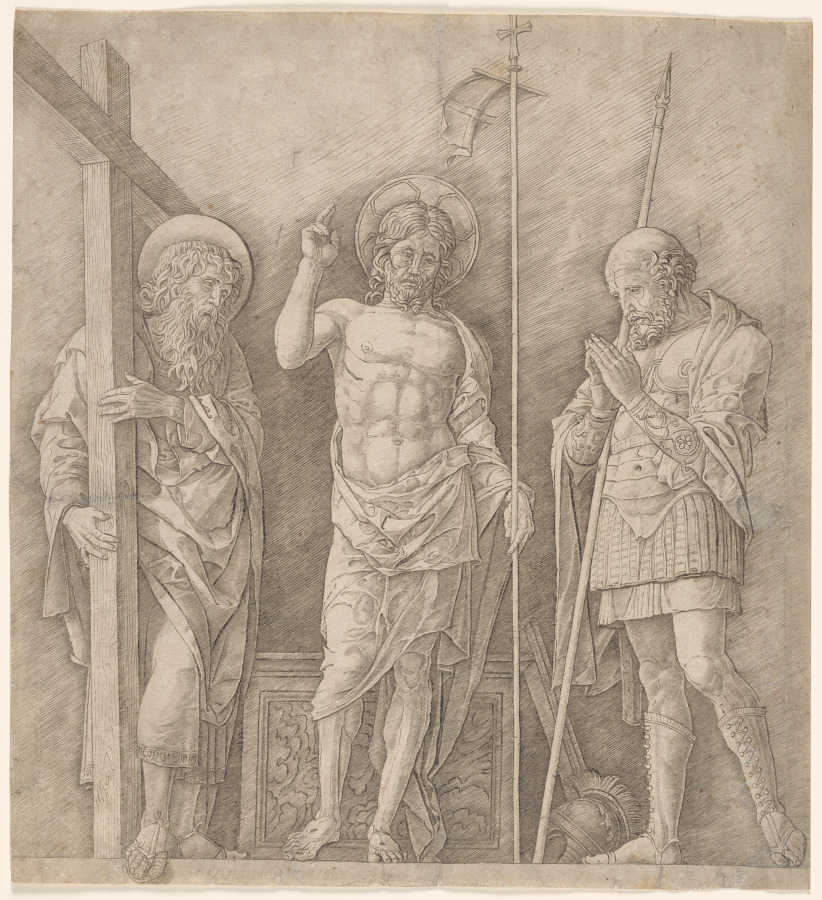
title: The Risen Christ Between Saints Andrew and Longinus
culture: Italy, 15th century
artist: Andrea Mantegna (Italian, about 1431–1506)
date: early 1470s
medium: engraving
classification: Print